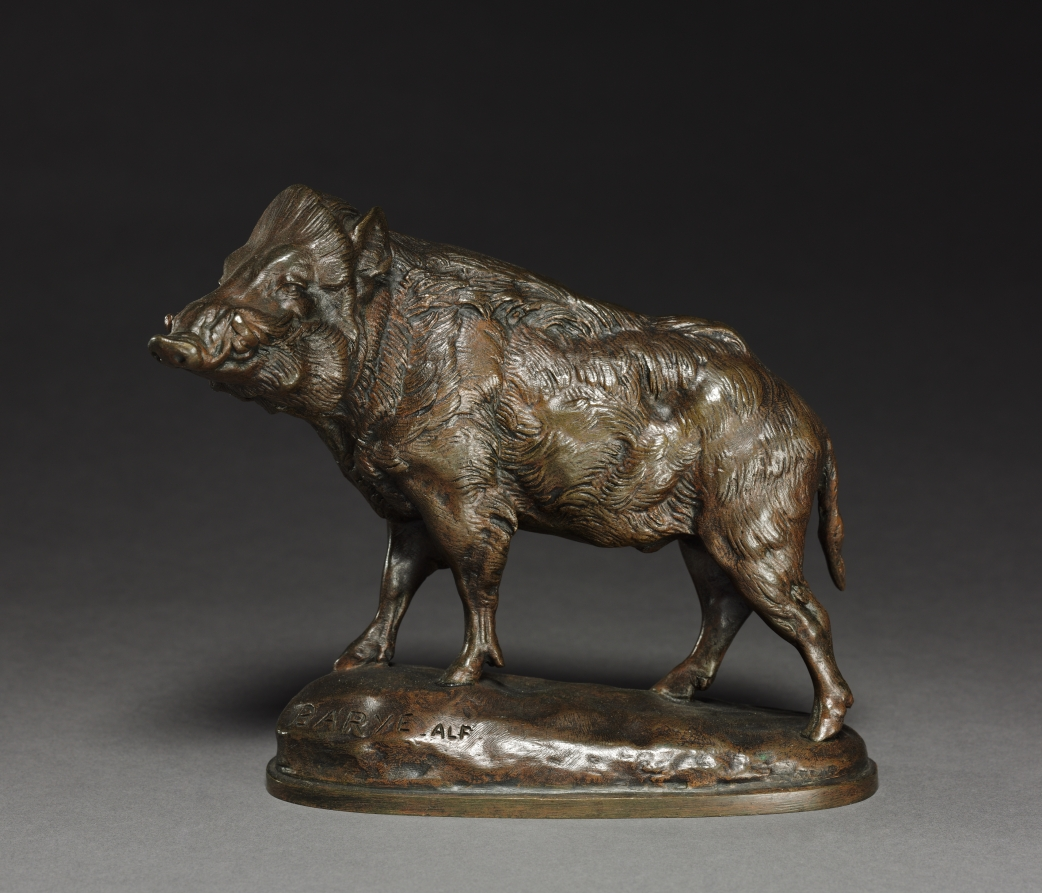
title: Wild Boar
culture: France, 19th century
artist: probably by Antoine-Louis Barye (French, 1796–1875)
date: 19th century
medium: bronze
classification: Sculpture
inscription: Signed" "Barye ALF" (...Foundry(?). On back of base: "C 808", in small letters